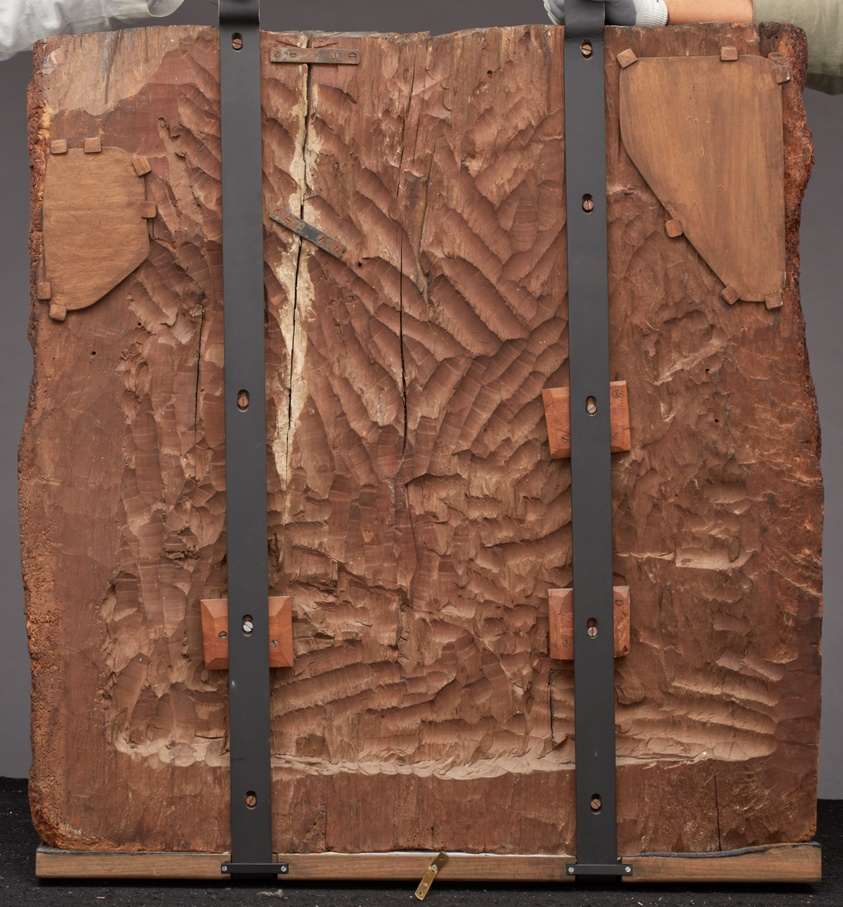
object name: Sculpture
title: The Birth of Saint John the Baptist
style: sixteenth century, 16th Century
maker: Artist unknown (Spanish (Burgos), active 16th century)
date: c. 1525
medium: Wood, polychromy, and gilding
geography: Spain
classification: relief; sculpture; sculpture/wood; spanish; wood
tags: religious scenes, bed, fire, women, woman, babies, birth, Christianity, Christian subjects, Saint John the Baptist, saints, religious figures, religious, religion